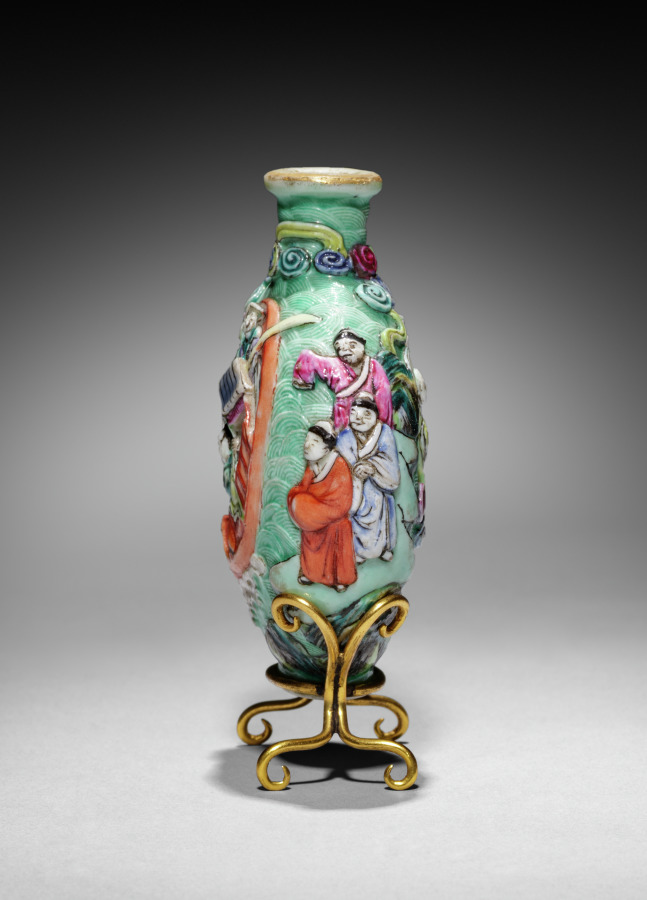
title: Flattened Ovoid Snuff Bottle with Stopper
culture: China, Qing dynasty (1644-1911), Jiaqing reign (1796-1820)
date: 1796–1820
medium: porcelain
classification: Ceramic